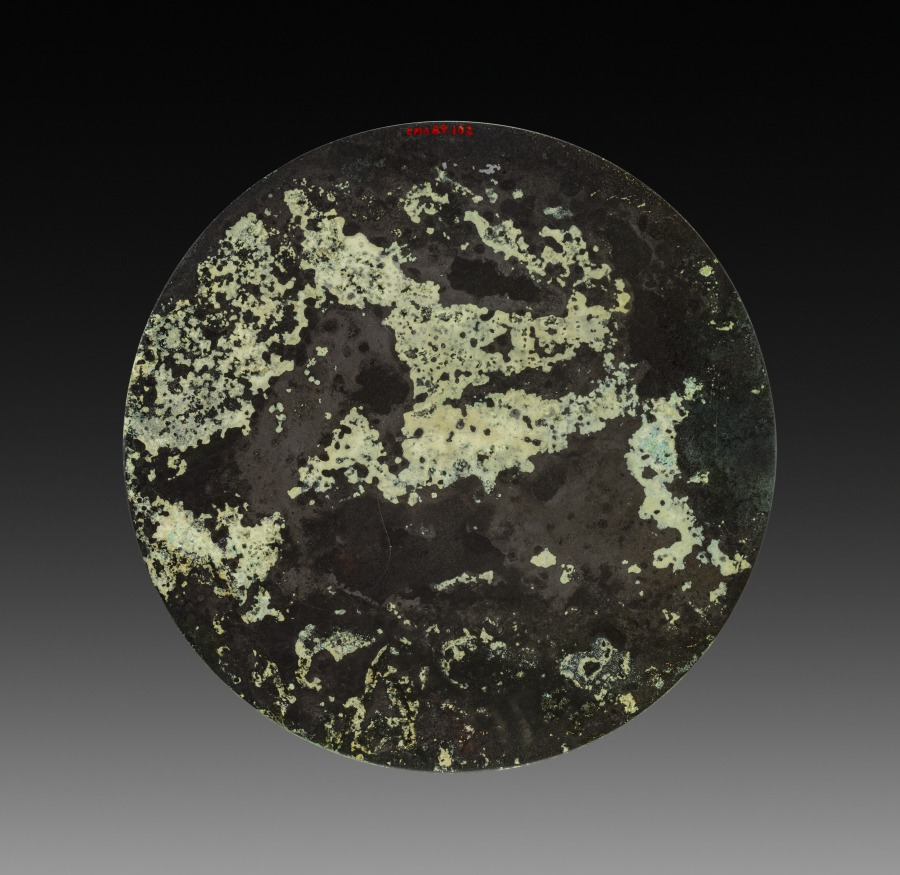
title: Mirror with Four Nipples, Immortals, Dragon and Tiger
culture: China, probably Zhejiang province, Eastern Han dynasty (25–220 CE)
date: c. 125–220 CE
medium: bronze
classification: Metalwork